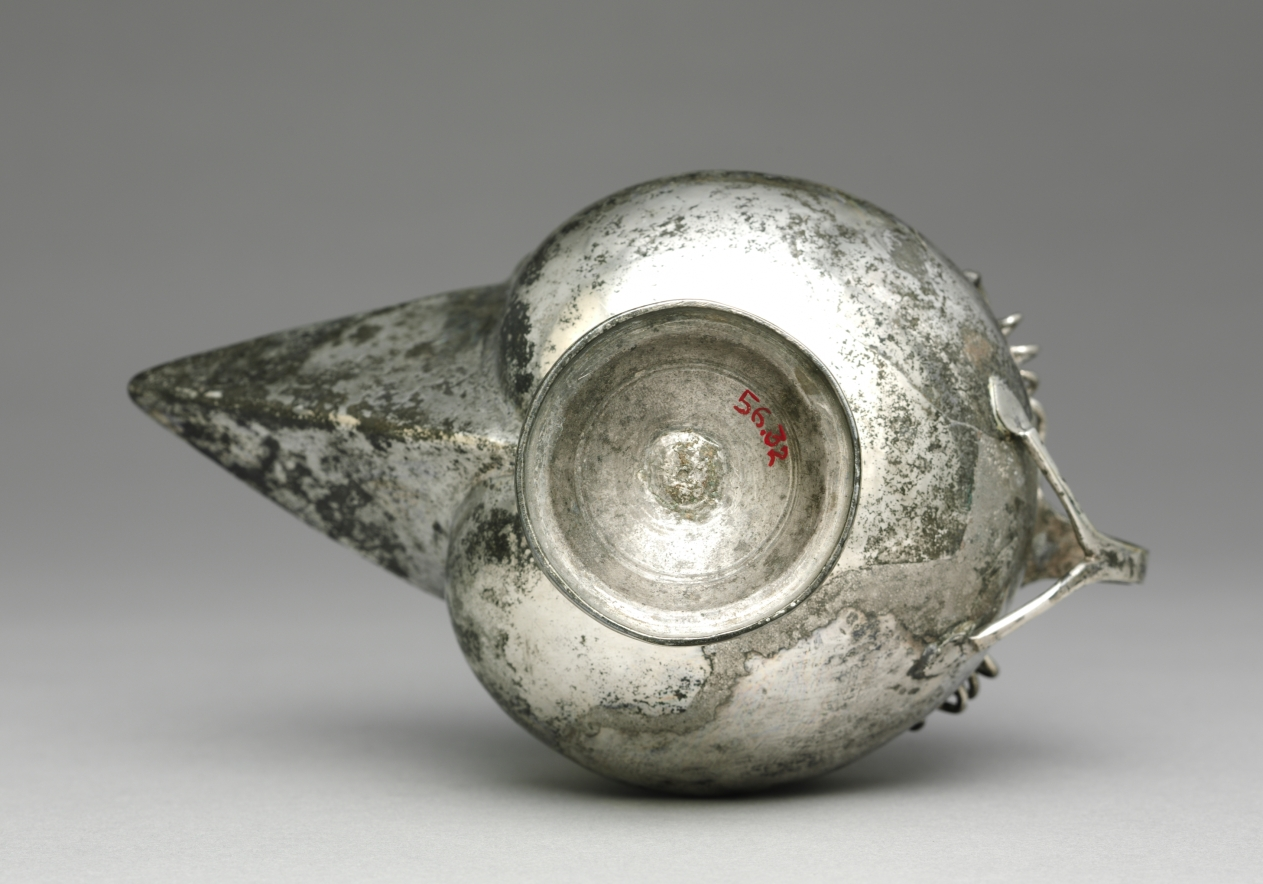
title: Spouted Pitcher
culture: Byzantium, Syria(?), Byzantine period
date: 300–600 CE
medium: silver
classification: Metalwork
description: A large quantity of tableware survives from the Roman Empire, including this piece from Antioch and the Eastern Mediterranean. Most of the recovered groups of silver seem to have been hoards concealed during times of trouble. A complete table service, called a ministerium in Latin and a synthesis in Greek, consisted of silver for eating and drinking: trays, platters, plates, dishes, spoons, pepper dispensers, goblets, pitchers, ladles, and bowls. The god of wine, Dionysos, was frequently depicted on drinking and eating vessels.